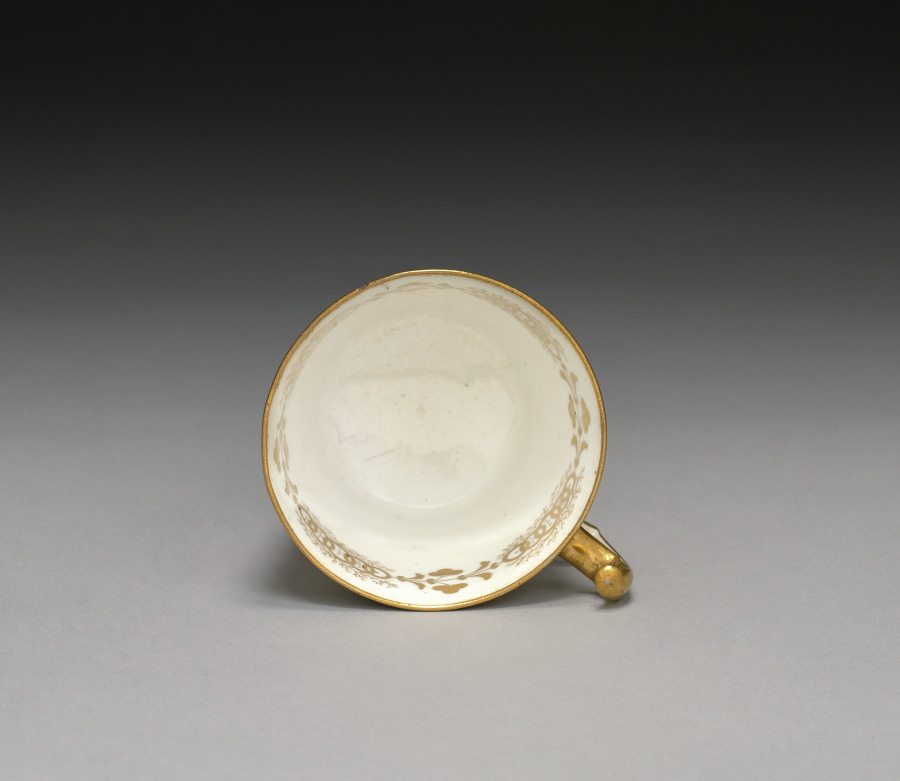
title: Cup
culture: England, Staffordshire, late 18th century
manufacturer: Spode Factory (British)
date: late 1700s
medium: porcelain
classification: Ceramic